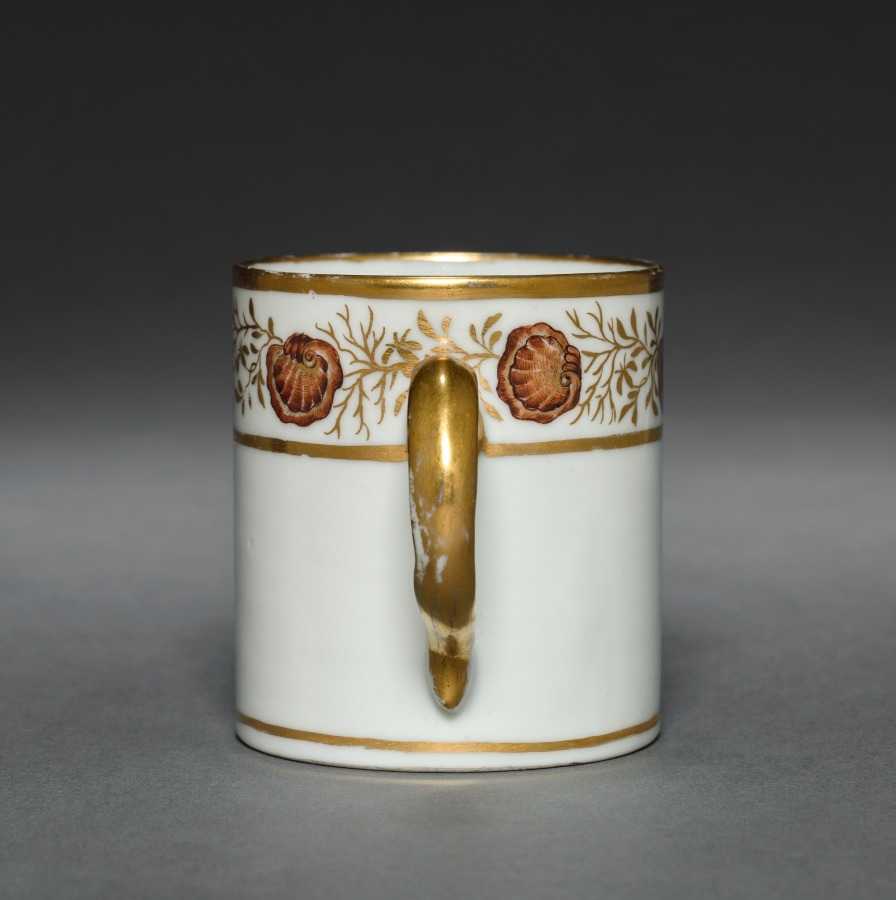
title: Cup from Oliver Wolcott, Jr. Tea Service (1 of 6)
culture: Chinese Export porcelain, late 18th-early 19th century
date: 1785–1805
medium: porcelain, sepia enamel, gold leaf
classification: Ceramic